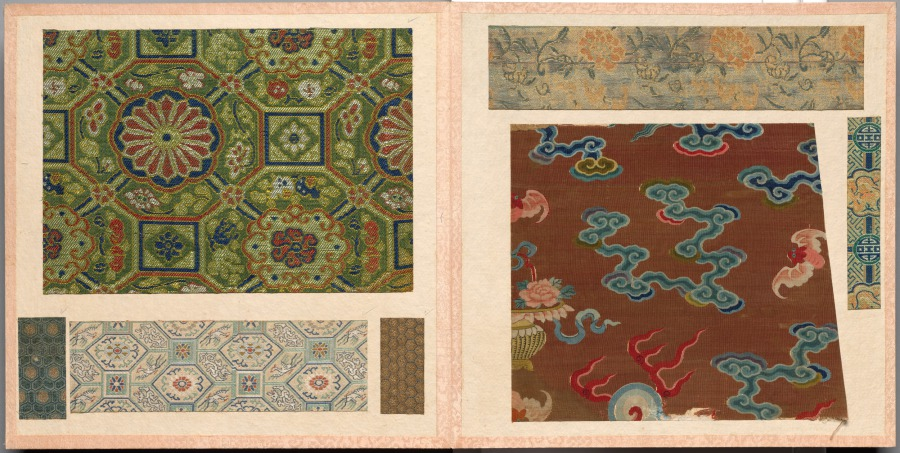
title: Album of Textile Samples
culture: Japan and China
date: 1700s–1800s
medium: silk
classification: Textile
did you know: This album contains 46 pages with 156 mounted Chinese or Japanese textile samples.